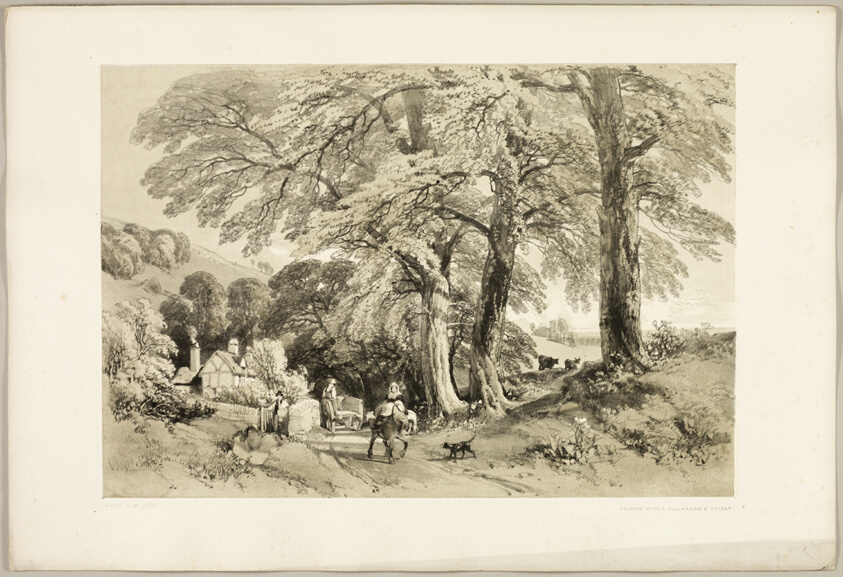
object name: Print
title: Wych Elm, from The Park and the Forest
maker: James Duffield Harding (English, 1798-1863); printed by Charles Joseph Hullmandel (English, 1789–1850); published by Thomas McLean (English, 1788–1875)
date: 1841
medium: Lithograph in black, with gray tint from a second plate, on ivory wove paper, laid down on ivory wove paper (chine collé)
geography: England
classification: lithograph; print; prints and drawing